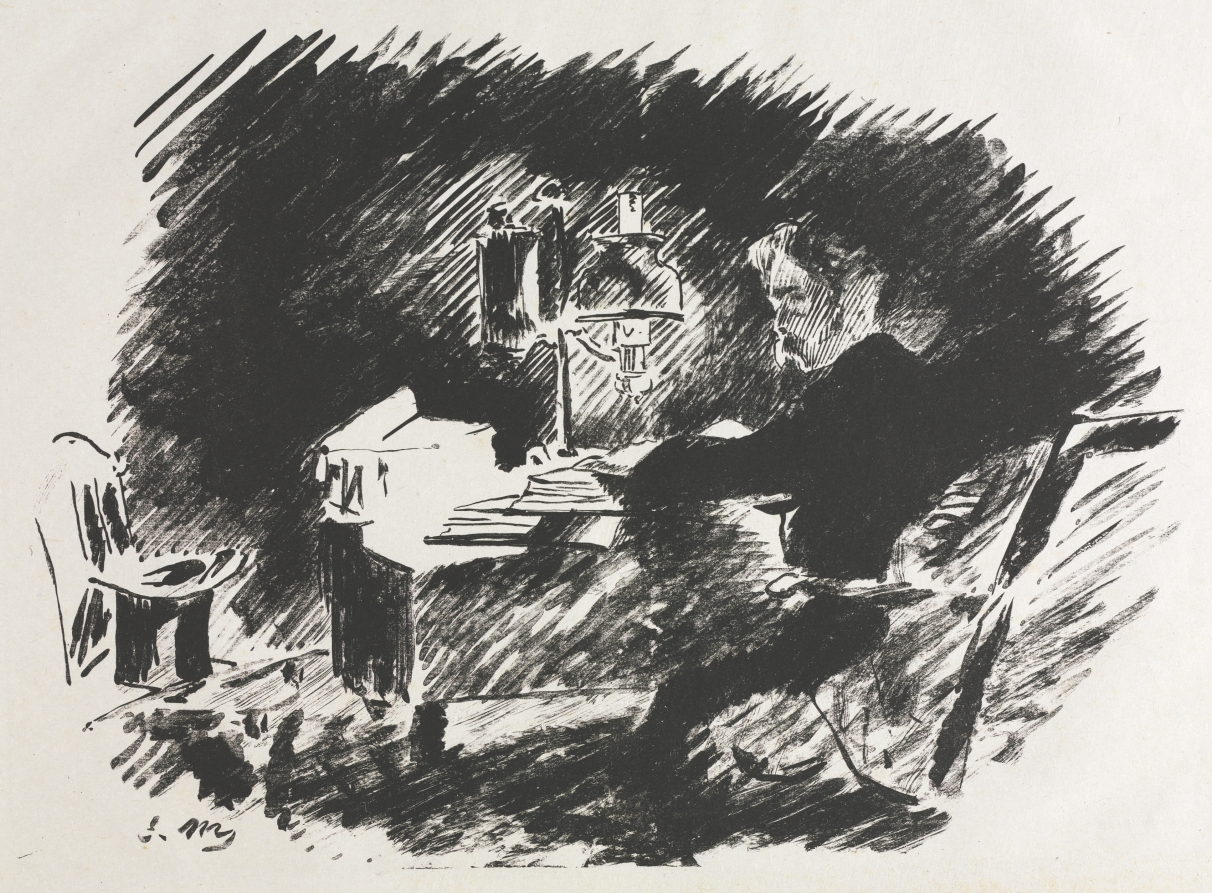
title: Illustration for The Raven by Edgar Allan Poe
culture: France, 19th century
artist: Édouard Manet (French, 1832–1883)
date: 1875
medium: lithograph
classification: Print